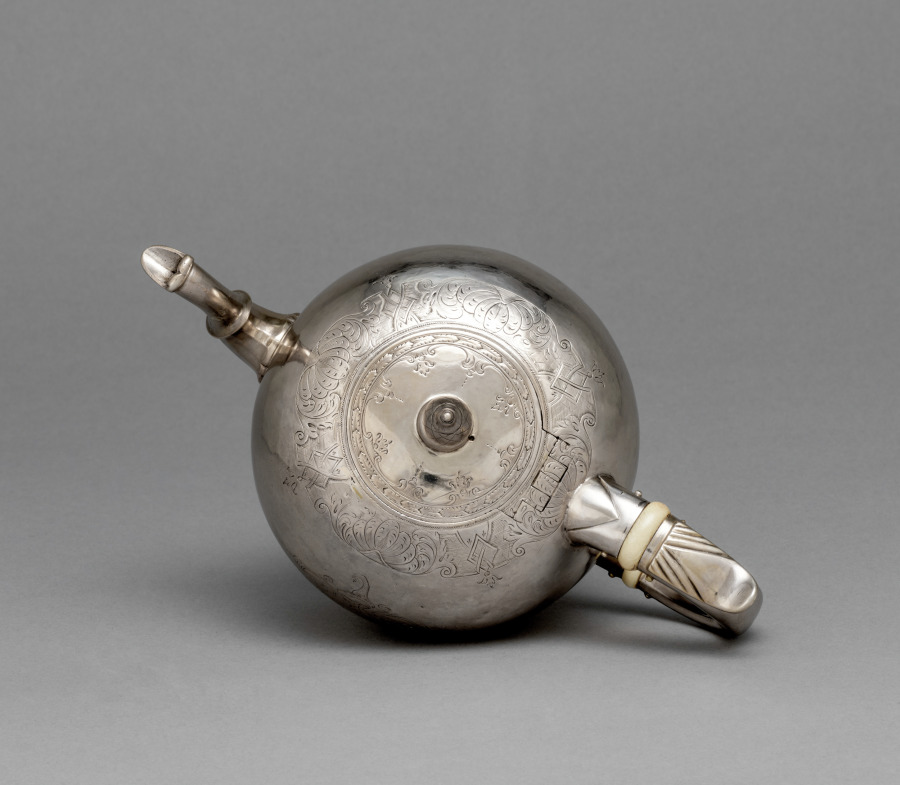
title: Teapot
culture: America, Massachusetts, Boston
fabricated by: Jacob Hurd (American, 1702–1758)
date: c. 1740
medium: silver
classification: Silver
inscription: engraved coat of arms of Whipple.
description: This teapot was made by Jacob Hurd, the father of Nathaniel Hurd whose portrait by John Singleton Copley is in gallery 204. The finial is probably not original to this teapot.